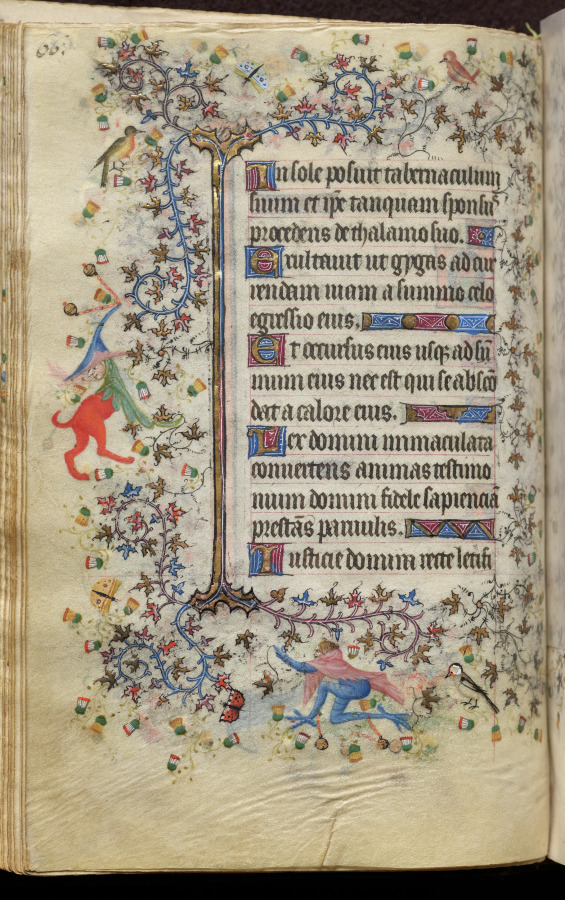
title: Hours of Charles the Noble, King of Navarre (1361-1425): fol. 33v, Text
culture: France, Paris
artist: Master of the Brussels Initials and Associates (French)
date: c. 1405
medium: ink, tempera, and gold on vellum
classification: Bound Volume